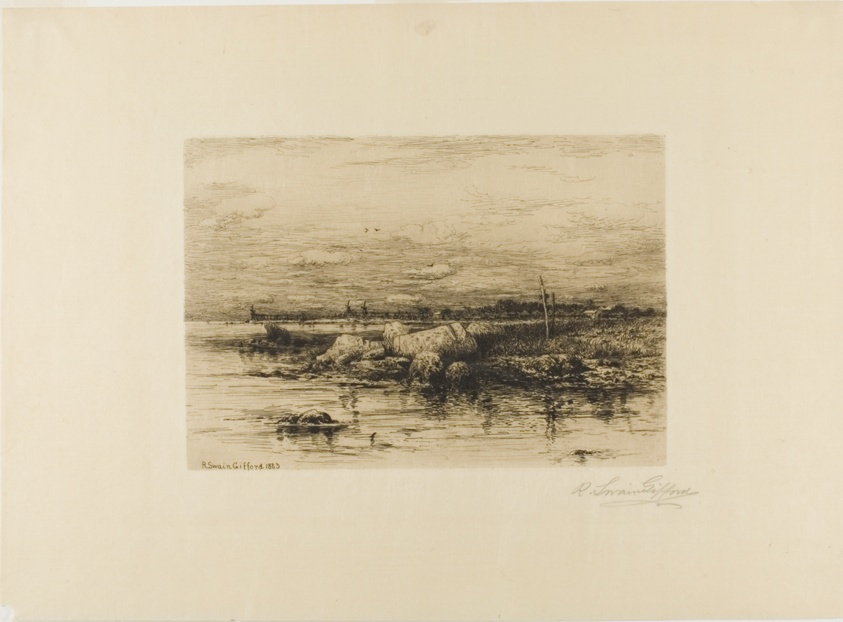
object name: Print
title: The Mouth of the Apponagansett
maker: Robert Swain Gifford (American, 1840-1905)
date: 1883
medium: Etching on cream China paper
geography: United States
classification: etching; print; prints and drawing